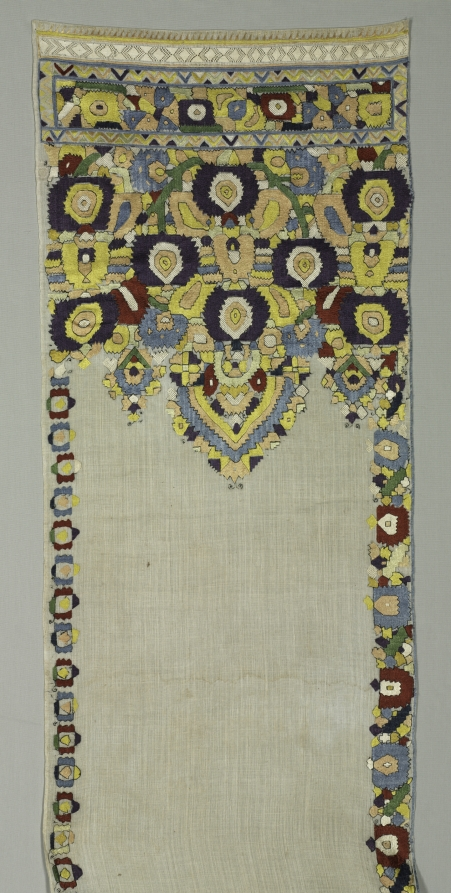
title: Mirror cover (tensifa)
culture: Africa, North Africa, Morocco, Tétouan, Moroccan embroiderer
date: 1700s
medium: Linen, silk, dye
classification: Embroidery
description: Special embroidered textiles were used by newylwed Moroccan couples to cover the mirror in their home. This was done to protect them from the evil eye and unfavorable gazes.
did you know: Satin stitch is used to produce the broad, smooth surface of the floral patterns seen here.